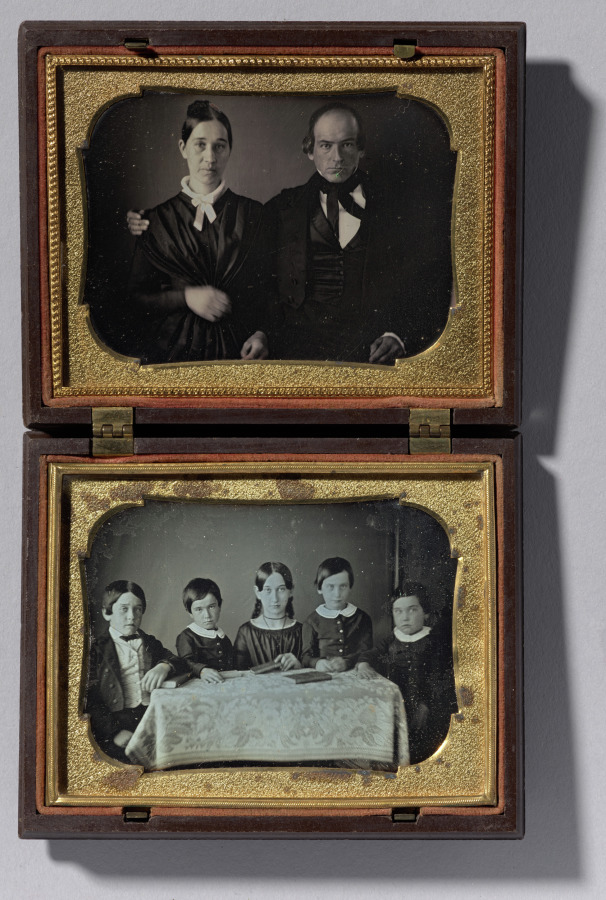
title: Parents of five children doing homework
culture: America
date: c. 1858–60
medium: daguerreotype, quarter plate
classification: Photograph